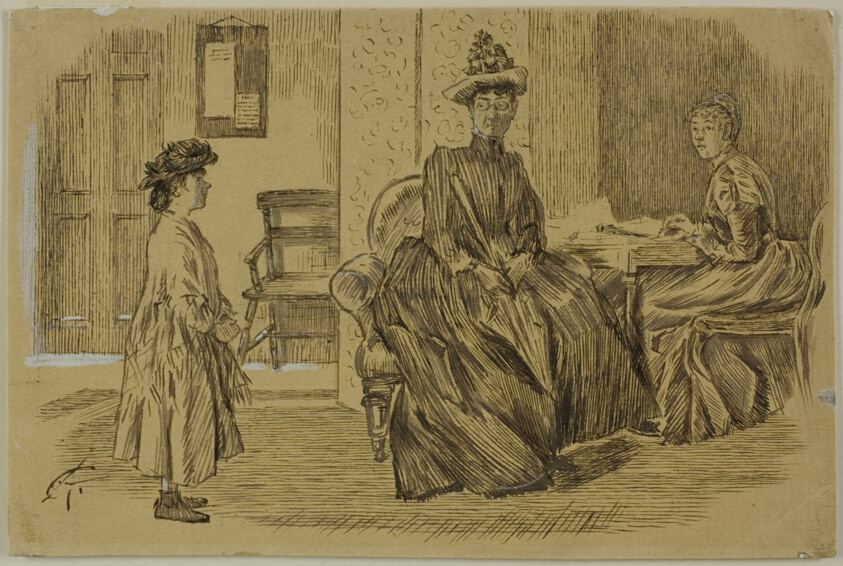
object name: Drawing and Watercolor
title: At the Employment Office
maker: Charles Samuel Keene (British, 1823-1891)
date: 1870/91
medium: Pen and brown ink, with brush and brown wash, corrected with white gouache, on tan wove paper, laid down on card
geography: England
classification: pen and ink drawings; drawings (visual works); prints and drawing